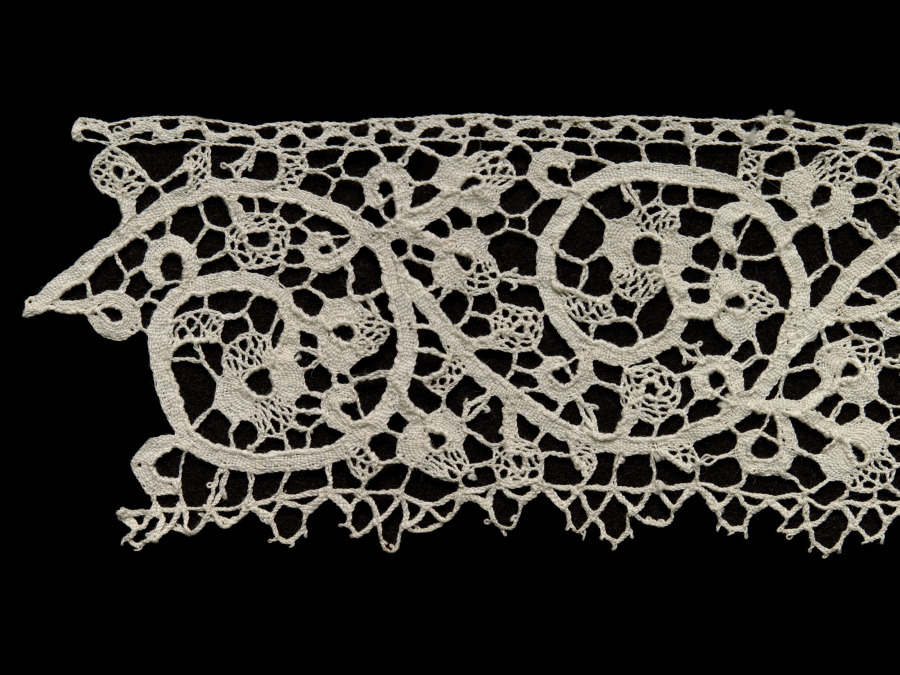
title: Lace Edging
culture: Belgium (Flanders)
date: 1900–1935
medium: Cotton: bobbin lace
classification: Lace